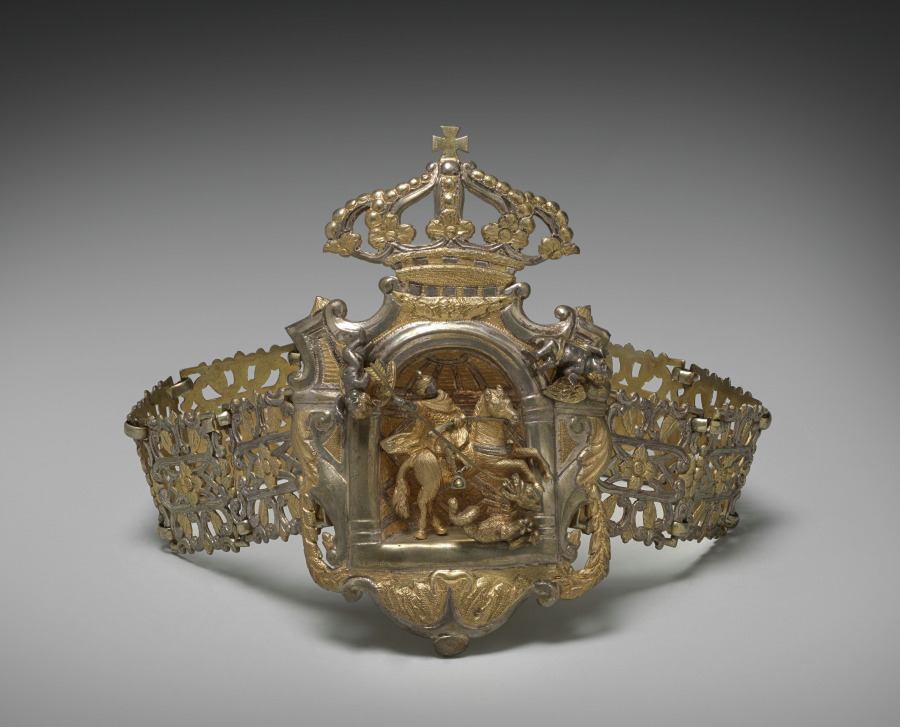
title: Woman's Costume (Metal Belt Buckle)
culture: Italy, Sicily, 19th century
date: 1800s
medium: silver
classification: Metalwork